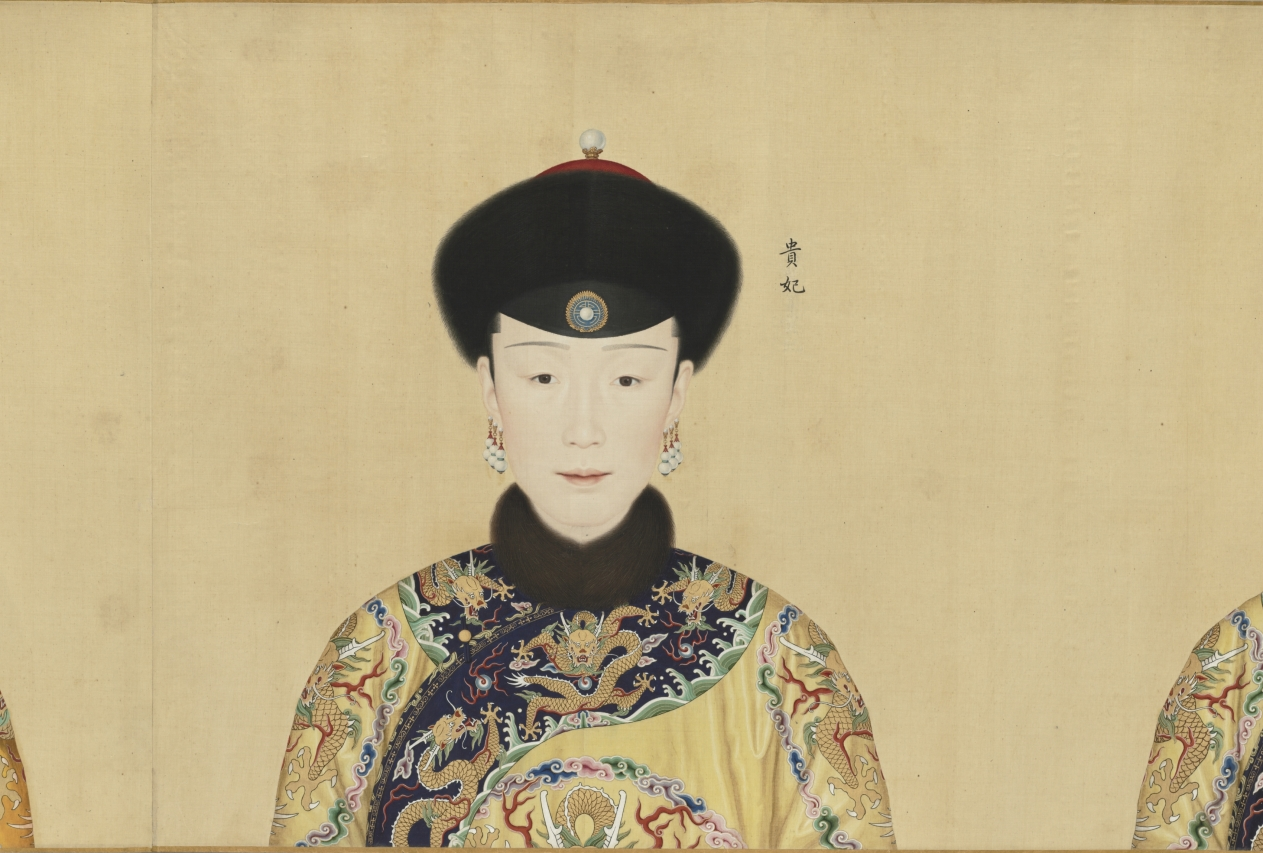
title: Portraits of the Qianlong Emperor and His Twelve Consorts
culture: China, Qing dynasty (1644–1911), Qianlong reign (1736–95)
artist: Giuseppe Castiglione (Italian, 1688–1766)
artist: and others (Chinese)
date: 1736–70s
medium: Handscroll; ink and color on silk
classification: Painting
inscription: 9 seals of the Qianlong emperor (r. 1736–95).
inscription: The eighth month, first year of Qianlong [1736] 乾隆元年八月吉日. The Empress (Xiaoxian) 皇后 (1712–1748), The Guifei (Huixian) 貴妃 (?-–1745), Chunfei 純妃 (1713–1760), Jiafei 嘉妃 (?–1755), Lingfei 令妃 (1727–1775), Shufei 舒妃 (1728–1777), Qingbin 慶嬪 (1724–1774), Yingbin 穎嬪 (1731–1800), Xinbin 忻嬪 (?–1764), Dunfei 惇妃 (1746–1806), Xunfei 順妃 (1749–1788), Shunbin 循嬪 (?–1797).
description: This portrait shows the Qianlong emperor at 26, in the first year of his reign. His likeness is followed by portraits of the empress and eleven consorts. Their portraits document the appearances of the court women around the time when they received their respective imperial titles, which occurred at different stages of the emperor's life. The first three portraits were done by the Jesuit (Roman Catholic) missionary artist Giuseppe Castiglione, whereas the later ones were by Chinese court painters. Formal portraiture contributed to the affirmation of status and construction of role and identity. This scroll served as both familial documentation and a "mind picture" of the Qianlong emperor, suggesting that his constructed image of emperorship was inseparable from concepts of self and family. It was stored in a carved red lacquer box bearing the original painting title Mind Picture of a Well-Governed and Tranquil Reign (see CMA 1969.32).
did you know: Lingfei 令妃 (1727–1775), the first consort depicted in the maroon or “incense-colored" 香色 robe, was the mother of six of Qianlong’s children, including the future Emperor Jiaqing.